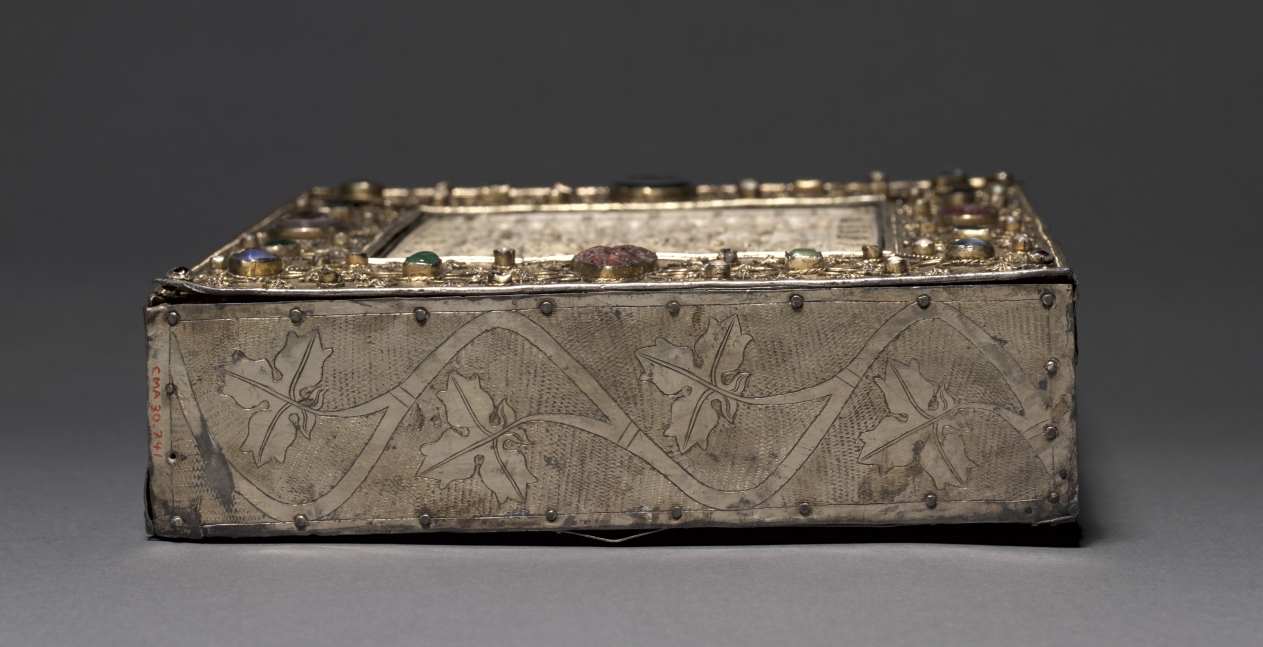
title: Book-Shaped Reliquary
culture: Ivory: Ottonian, Lorrain; Frame: Germany, Lower Saxony, Brunswick, Gothic period, 14th century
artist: circle of The Master of the Registrum Gregorii (German, active c. 972–1000)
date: c. 1000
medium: ivory, silver: gilded, pearls, rubies, emeralds, crystals, onyx, carnelian, oak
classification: Metalwork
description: This sumptuous object closely resembles a deluxe medieval book cover in both form and decoration. It was likely commissioned by Otto the Mild, Duke of Saxony (reigned 1318–48) around 1340. It was made to contain a leaf from each gospel and relics of the 11,000 virgins and 4 other saints. These relics were originally kept in a cavity behind the delicately carved ivory plaque depicting scenes from the Wedding at Cana (John 2:1–11). The story of Christ's first miracle is presented in three scenes. In the upper left, the Virgin informs Christ and his apostles of the lack of wine at the wedding banquet. On the right, the groom, his bride, and their guests sit behind a table, two servants offering them goblets. In the lower register, two attendants pour water into the first of six storage vessels while Christ addresses his mother and the bride. The back of the reliquary shows the engraved figures of the main patron saints of Brunswick Cathedral: placed within a delicate Gothic architectural frame, Saint John the Baptist is flanked by Saints Blaise and Thomas Becket.